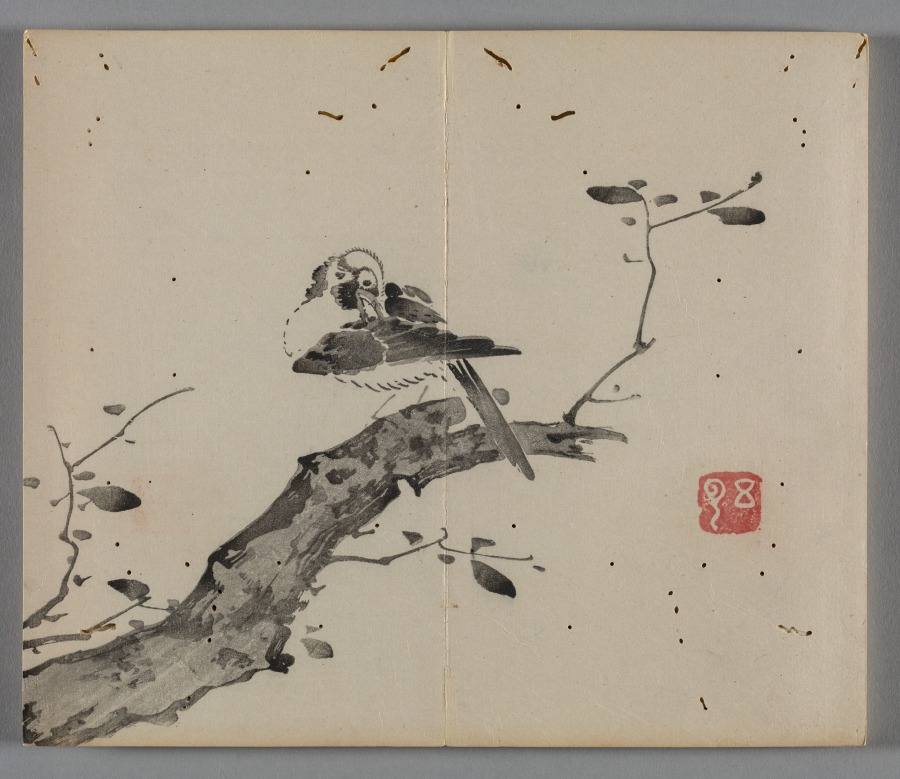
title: Ten Bamboo Studio Painting and Calligraphy Handbook (Shizhuzhai shuhua pu): Birds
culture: China, Qing dynasty (1644-1911)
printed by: Hu Zhengyan (Chinese, c. 1584–1674)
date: 1633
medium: Woodblock-printed book; ink and colors on paper; first edition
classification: Print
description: Color printing reached a level of perfection in the early 1600s, as seen in this Ten Bamboo Studio Collection of Calligraphy and Painting and the Mustard Seed Garden Manual of Painting (printed 1679 and 1701). The painterly quality, precision in registering (aligning) the woodblocks, and harmonious colors made them the most successful color print editions in Chinese history. Both editions were printed and compiled in Nanjing, spread nationwide, and had a great impact on the arts in Japan and Korea.